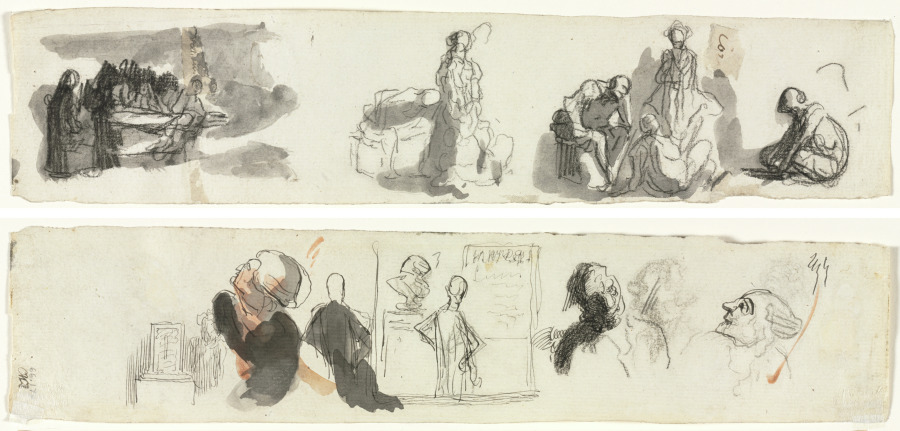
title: Sheet of Studies with a Group of Four Figures to the Right (recto) Sketches of Various Figures (verso)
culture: France, 19th century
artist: Honoré Daumier (French, 1808–1879)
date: third quarter 1800s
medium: black chalk and brush and gray wash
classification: Drawing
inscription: ON A SEPERATELY APPLIED PIECE OF PAPER, upper left, in gray ink: [illegible, cropped] ; ON A SEPERATELY APPLIED PIECE OF PAPER, upper right, in gray ink: co[cropped]